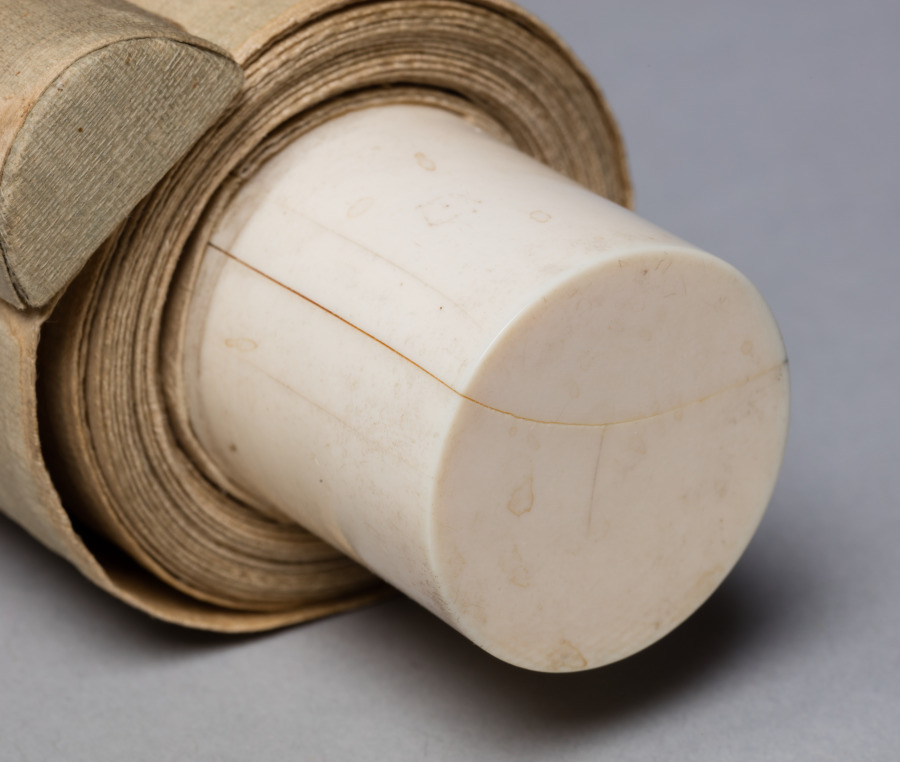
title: Symbols of Longevity: Deer under Peach and Pine (Pine) (right)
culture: Japan, Edo period (1615–1868)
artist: Toda Tadanaka (Japanese, 1761–1823)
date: 1801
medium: Pair of hanging scrolls; ink and color on silk (ivory roller ends)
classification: Painting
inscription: Righthand painting sealed lower right: rectilinear red seal above; unread, square red seal below; unread (a collector's seal)